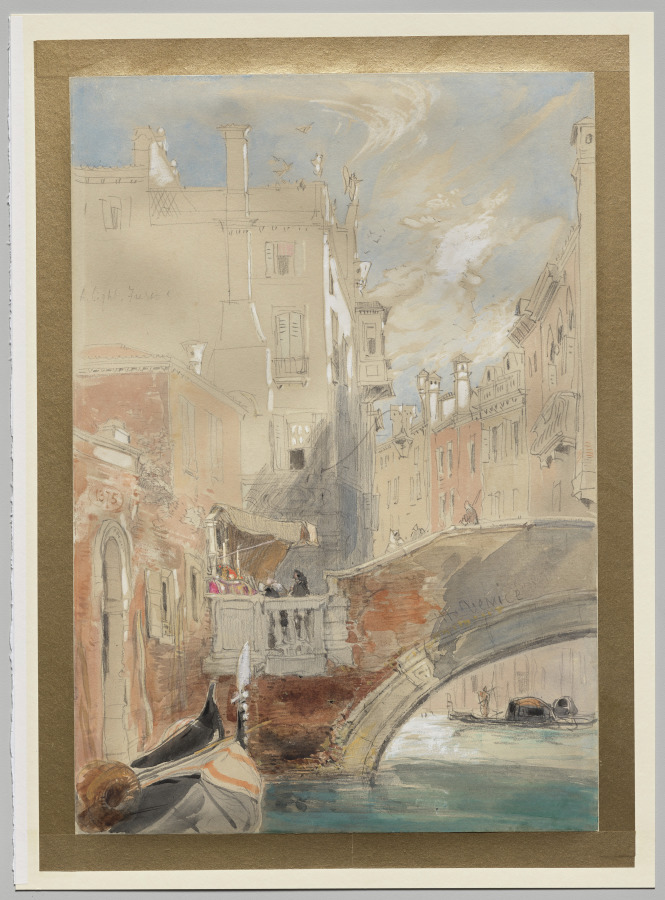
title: A Canal, Venice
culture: England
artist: James Holland (British, 1800–1870)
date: 1800–1870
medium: graphite and watercolor, heightened with white on buff paper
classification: Drawing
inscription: Signed with initials and inscribed "JH/Venice" center right, on bridge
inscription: inscribed “A. Light. Fresco” on building upper left.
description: Venice was one of the primary subjects of the British artist James Holland, and his works satisfied the 19th-century popular imagination of a romantic Venice, with its sun-kissed buildings, gondolas, and quaint bridges. The present sheet was executed during a trip to Venice in 1857. Holland worked on a buff-colored sheet of paper, sketching the composition in graphite, and then painting with watercolor in rust, pink, grey, and aqua, and light blue and white opaque watercolors. The unfinished section on the side of the palazzo at upper left suggests that this drawing was kept by Holland in his studio for his own reference or pleasure.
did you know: Opaque watercolor, also called gouache, or bodycolor, is watercolor paint made opaque with the addition of chalk, white pigment, or white paint.